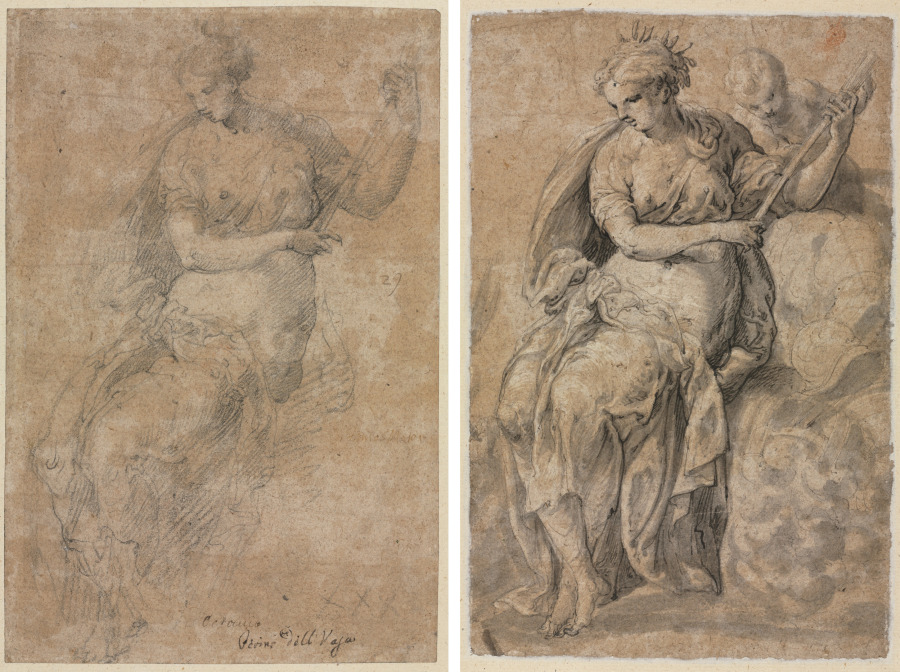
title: Allegorical Figure (recto and verso)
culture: Italy, 16th century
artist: Niccolo dell' Abbate (Italian, c. 1512–1571)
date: 16th century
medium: black chalk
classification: Drawing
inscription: by artist?, lower right, in black chalk: XXX ; center right, in brown ink: 29 ; center right, in brown ink: [O.?] Fama M[a?]jo[r?] 101. ; lower center, in brown ink: Octavio ; lower center, in brown ink: Perino dell' Vaga